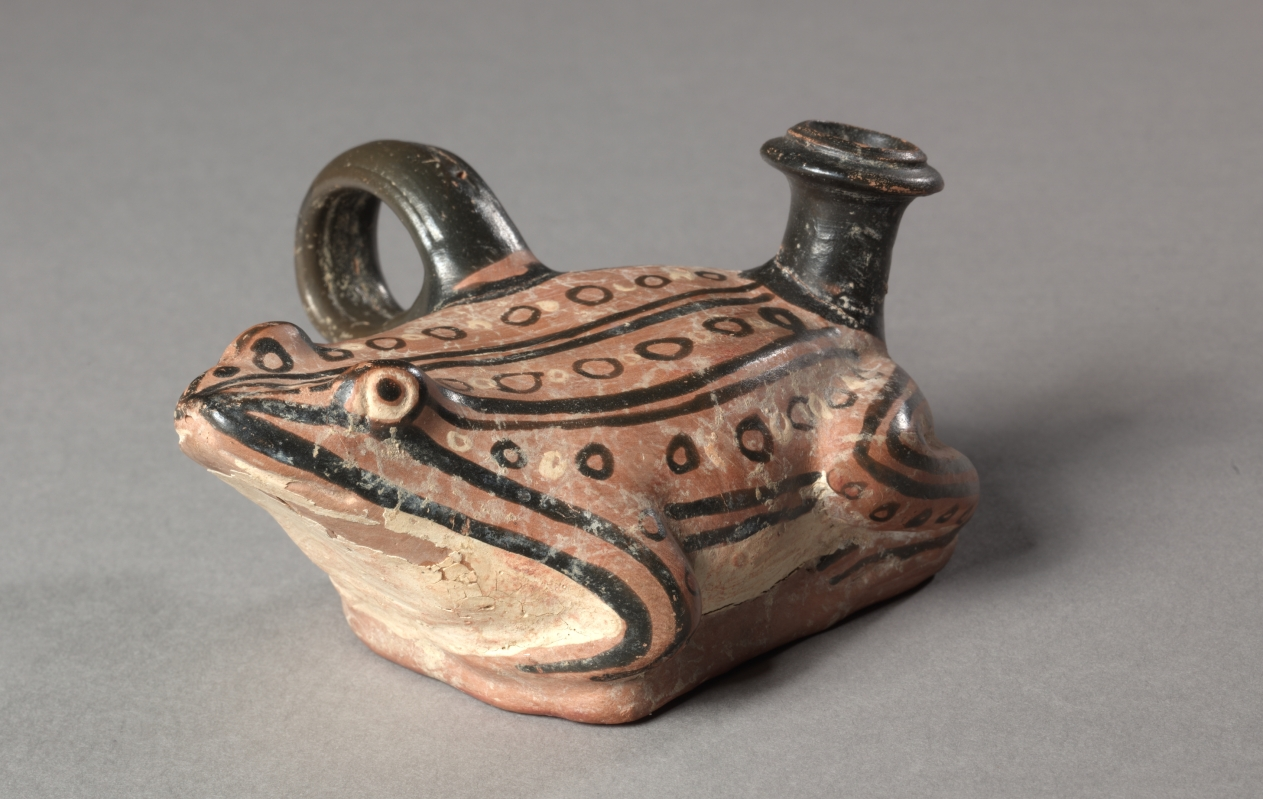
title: Frog-Shaped Guttus (Oil Flask)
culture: South Italian, Apulian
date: 300s BCE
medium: ceramic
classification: Ceramic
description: Guttus is a Latin word referring to a small vessel with vertical spout and ring handle, probably used for pouring small amounts of precious liquids. Often, mold-made ceramic gutti take the form of animals, with realistic painted decoration. Here, the lifelike frog features black stripes and alternating black and white circles.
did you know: The philosopher Plato famously compared the Greeks living along Mediterranean coastlines to “frogs around a pond.”